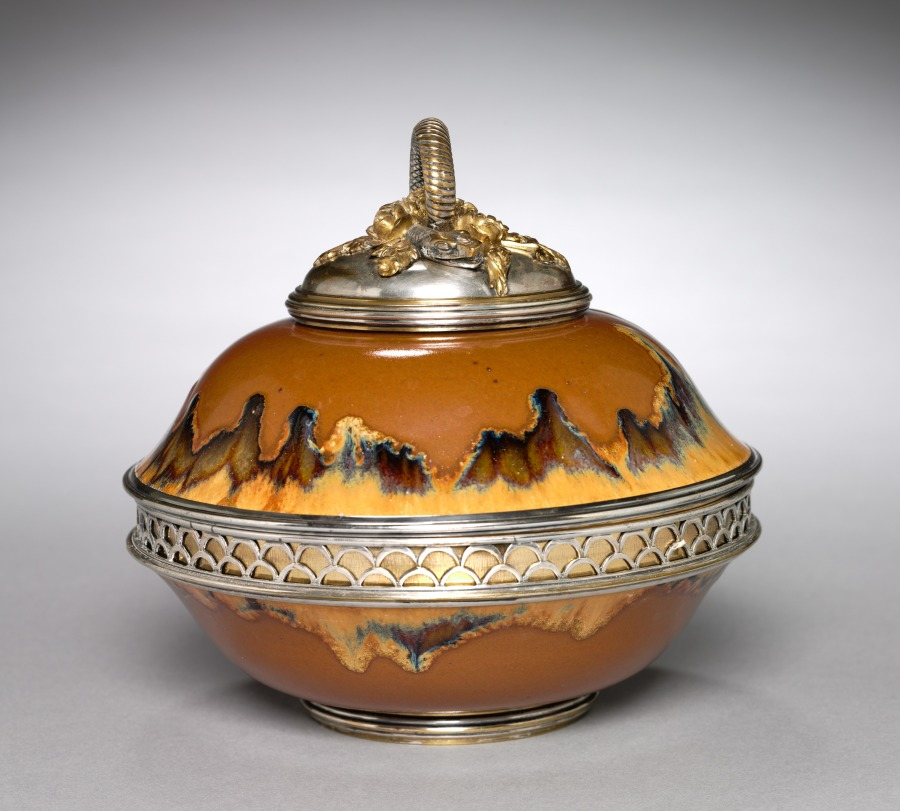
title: Covered Bowl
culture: France, late 19th-early 20th Century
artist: Auguste Delaherche (French, 1857–1940)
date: c. 1899–1900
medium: stoneware with metal mounts, silvered and gilded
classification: Ceramic